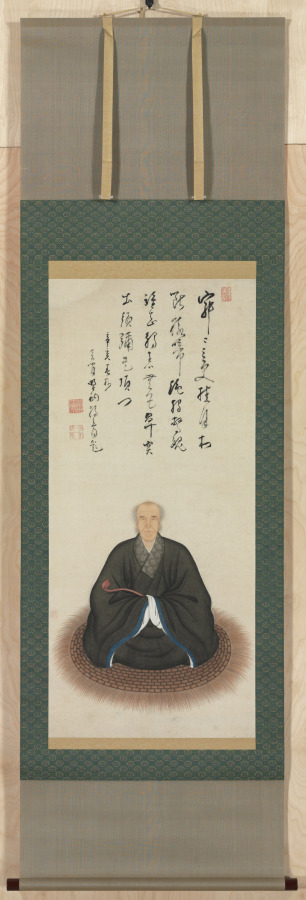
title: Portrait of Duli Xingyi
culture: Japan, Edo period (1615–1868)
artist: Kita Genki (Japanese, active c. 1664–98)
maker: Duli Xingyi (Chinese, 1596–1672)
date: 1671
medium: hanging scroll; ink and color on paper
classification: Painting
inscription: 1671 inscription at top of scroll by Duli Xingyi with three seals, 東矣䪩 (prefatory), 遺世獨立 (top) , 天外一閒人 (bottom); seal of Genki at lower left of painting 元規 .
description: In this portrait, the Ōbaku school Buddhist monk Duli Xingyi (born Tai Li, 1596–1672), whose name is pronounced Dokuryū Shōeki in Japanese, sits upon a woven mat holding a ceremonial scepter known as a ruyi, or nyoi in Japanese. Above his head is an insciption he added to the painting in 1671, the year before his death. It may be translated to read: Contemplative emptiness: the moon suspended over the village at midnight. Suddenly my soul is startled by the howl of an ape. Who could know that it would arouse me beyond my senses, and bring me an inner vision from Mt. Sumeru. (translated by Stephen Addiss and Kwan S. Wong) Originally from what is now the city of Hangzhou in China, Duli emigrated to Japan in 1653, where he took monastic vows. His skills in calligraphy and seal carving were formidable. Painter Kita Genki combined Chinese brush styles he learned in Nagasaki with Western painting techniques to capture Duli's likeness.